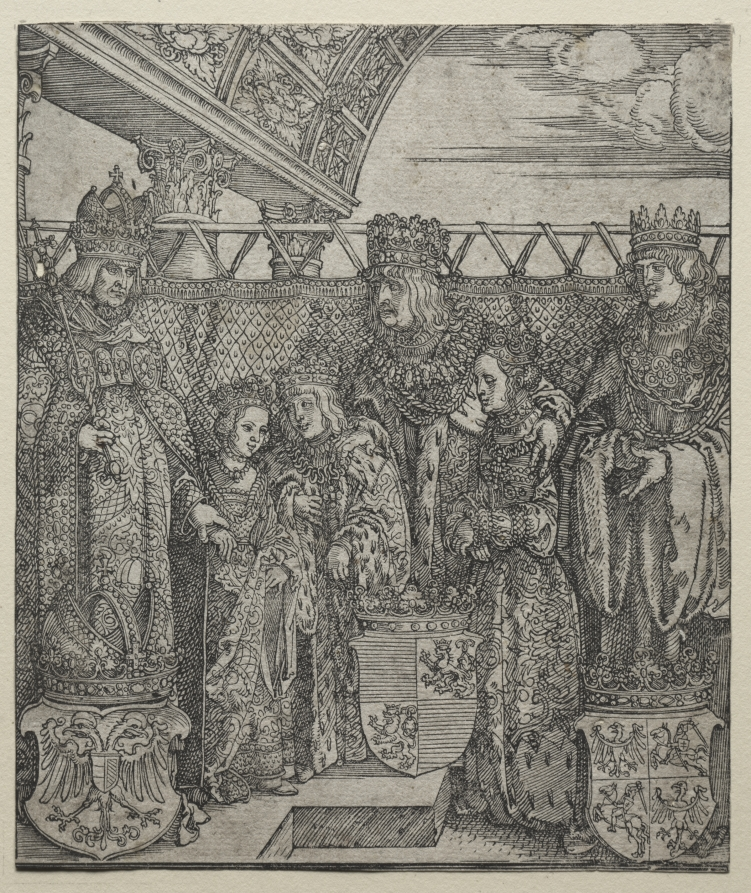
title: The Congress of Princes at Vienna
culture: Germany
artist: Albrecht Dürer (German, 1471–1528)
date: 1512–15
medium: woodcut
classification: Print